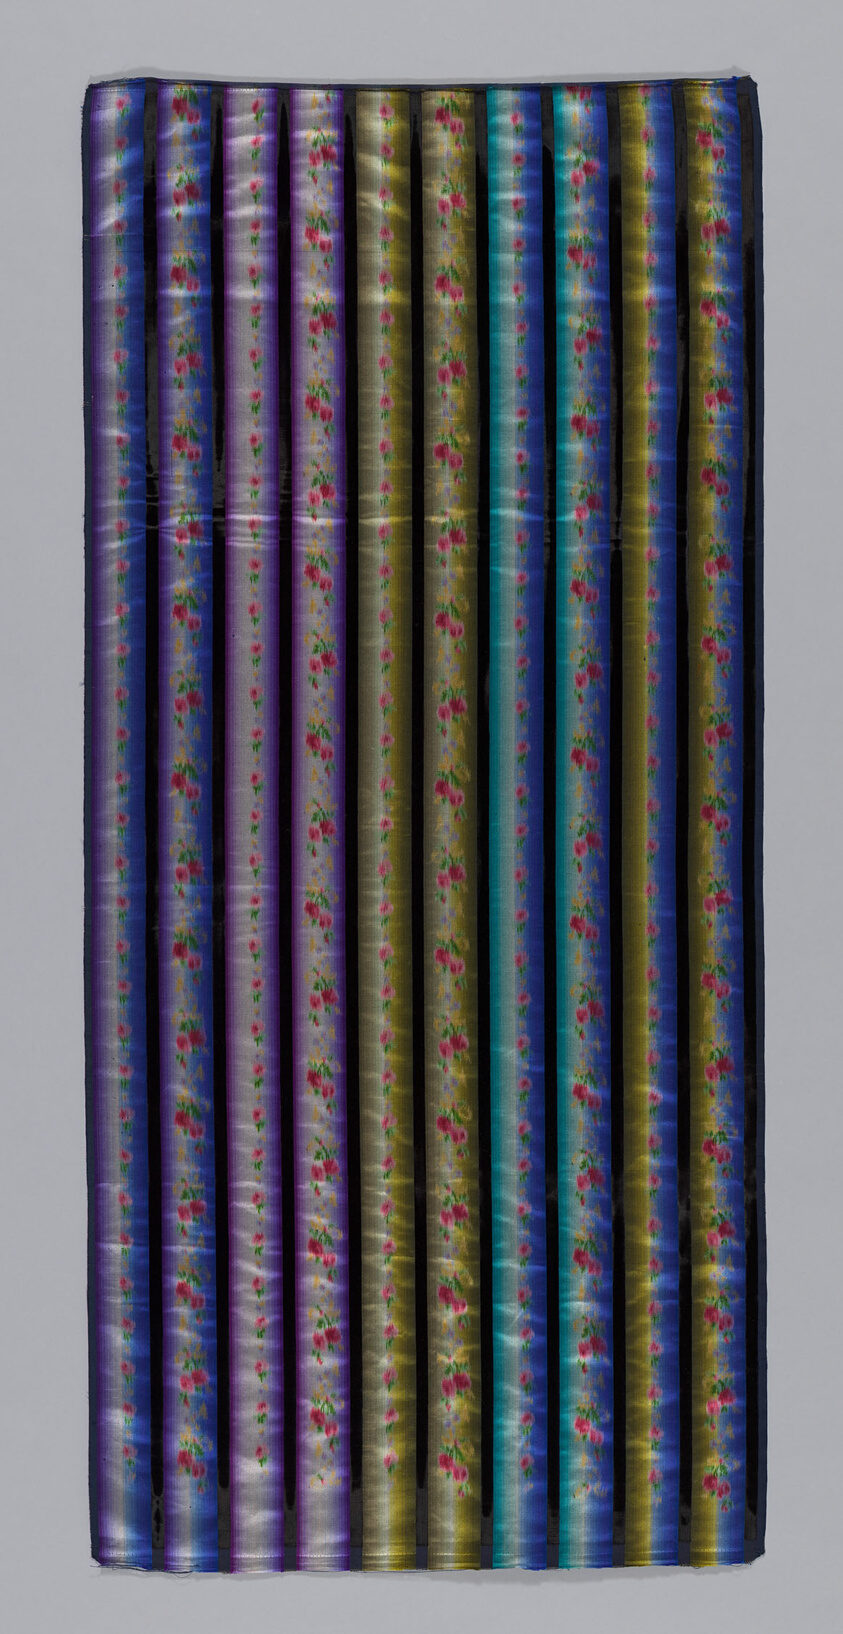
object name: Textile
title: Panel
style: victorian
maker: France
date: 1880s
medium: Silk and cotton, stripes of warp-float faced satin weave; warp-printed (chine) and stripes of plain weave with supplementary pile warps forming cut solid velvet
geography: France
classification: textile; weaving